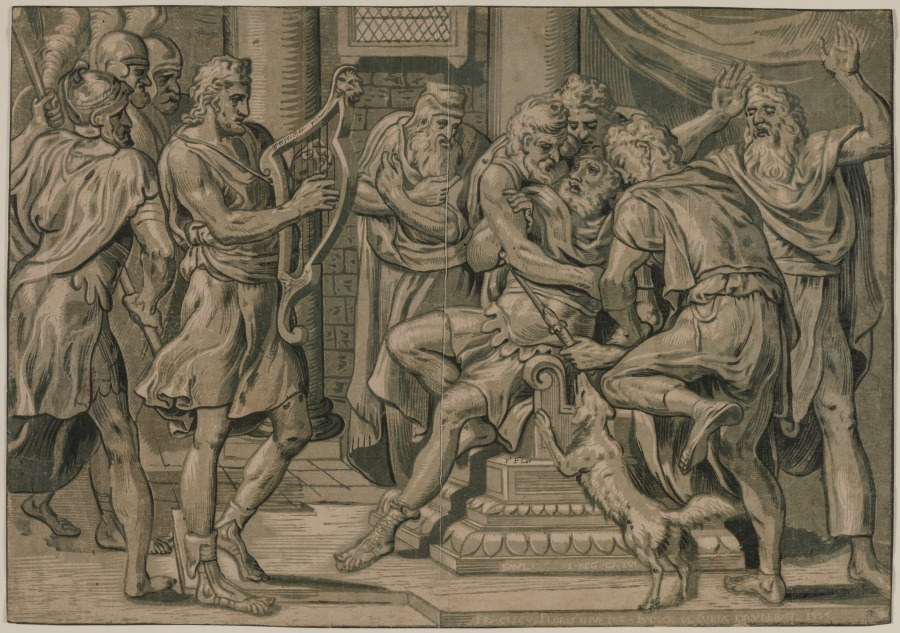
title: David Playing the Harp before Saul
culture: Netherlands, 16th century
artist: after Frans Floris (Netherlandish, 1519–1570)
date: 1555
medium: chiaroscuro woodcut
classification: Print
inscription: in block, " SAVL I REG CA XVI/FRACISCVS FLORIS INVETOR IVDOCE DL CVRIA EXCVDERAT 1555". (Later) inscriptions in the image penned in black. VERSO: Additional inscriptions in brown ink and graphite.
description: The soothing effect of David’s music upon the melancholic King Saul, as relayed in the Old Testament and depicted here by Frans Floris, is the earliest visual evidence of the therapeutic use of music. Floris’s woodcut would have had contemporary relevance in its affirmation of Martin Luther’s belief that music-a divine power that creates order—had been made by God to combat the destructive power of evil.